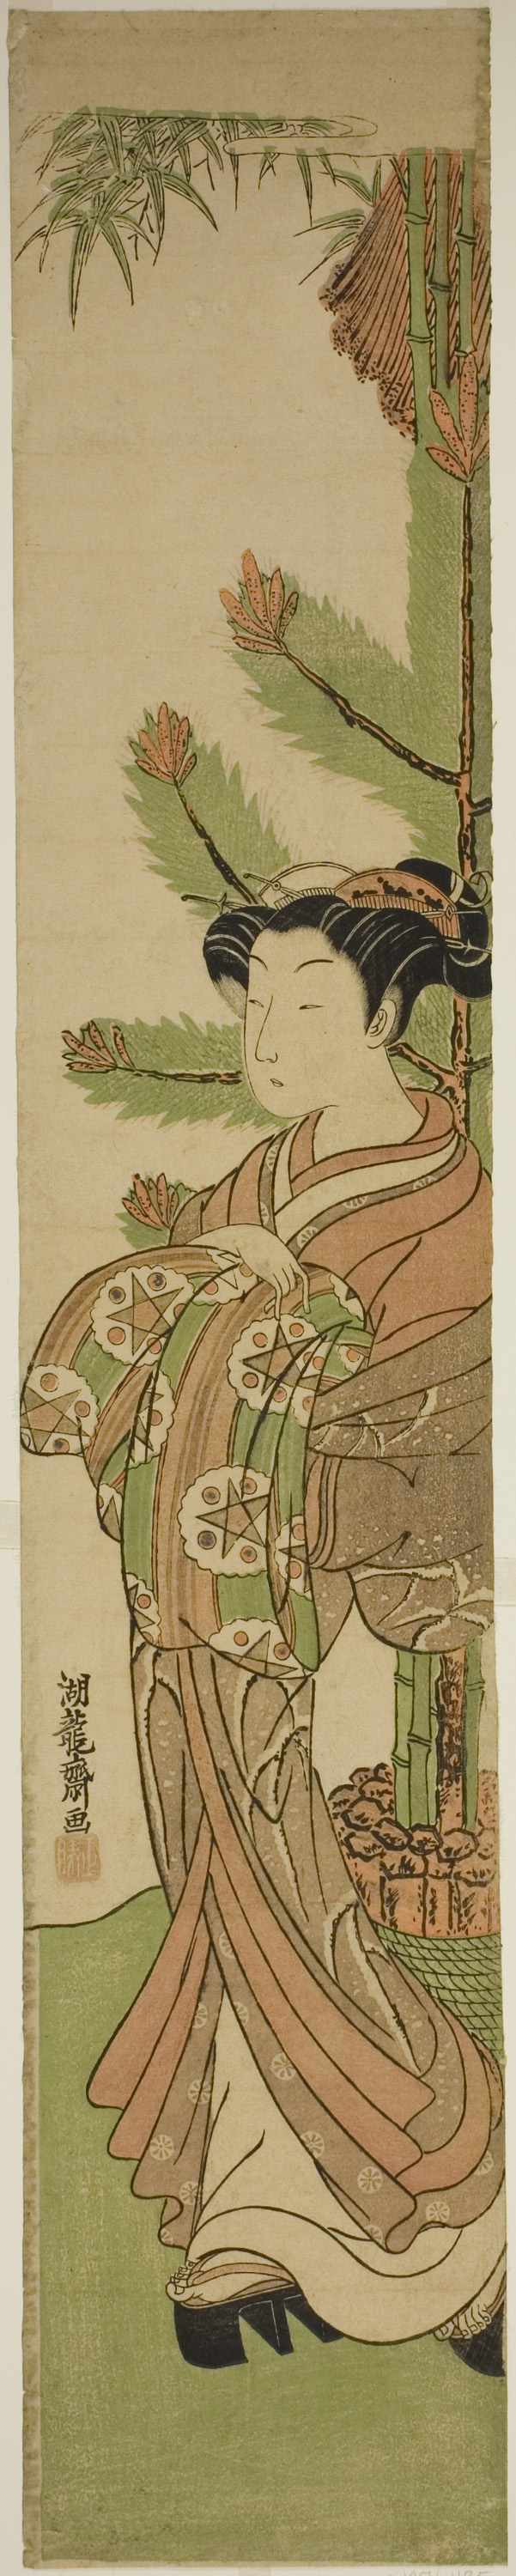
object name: Print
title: Courtesan in Front of New Year's Decoration of Pine and Bamboo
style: Japanese (culture or style)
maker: Isoda Koryusai (Japanese, 1735-1790)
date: c. early 1770s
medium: Color woodblock print; hashira-e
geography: Japan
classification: woodblock print; print; asian art